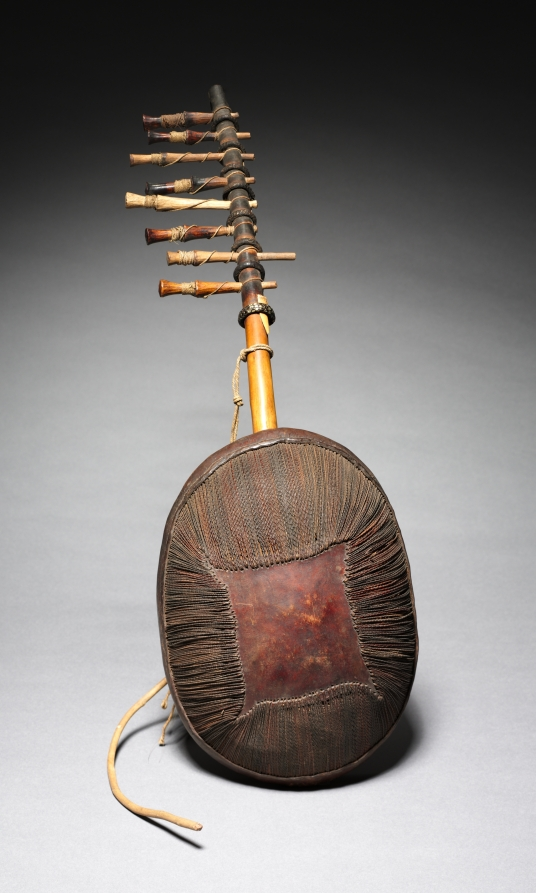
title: Musical Instrument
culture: East Africa, Uganda, 20th century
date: 1900s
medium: wood and leather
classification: Musical Instrument